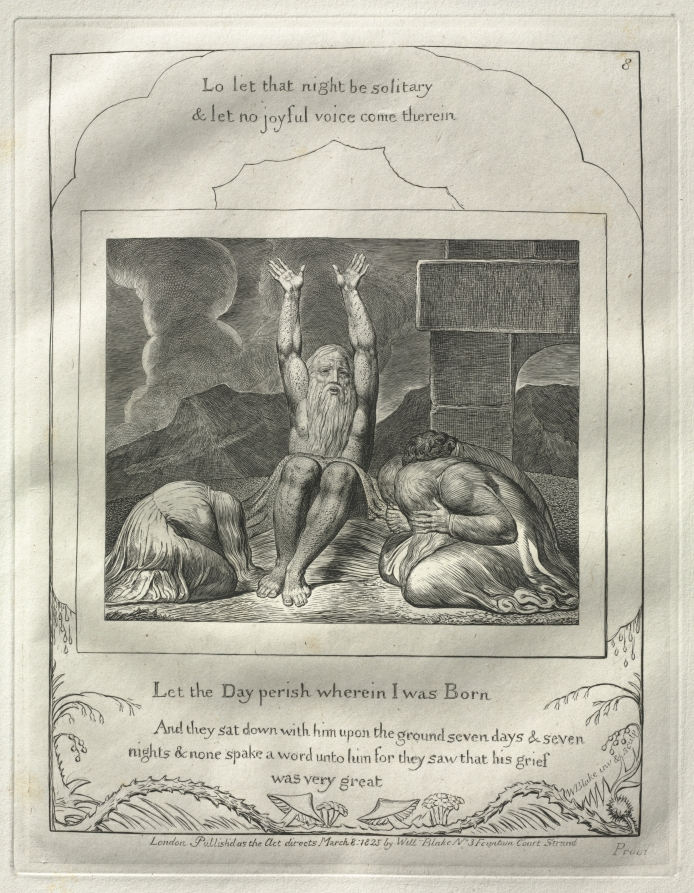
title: The Book of Job: No. 8, Let the Day perish wherin I was born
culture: England, 19th century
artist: William Blake (British, 1757–1827)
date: 1825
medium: engraving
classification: Print